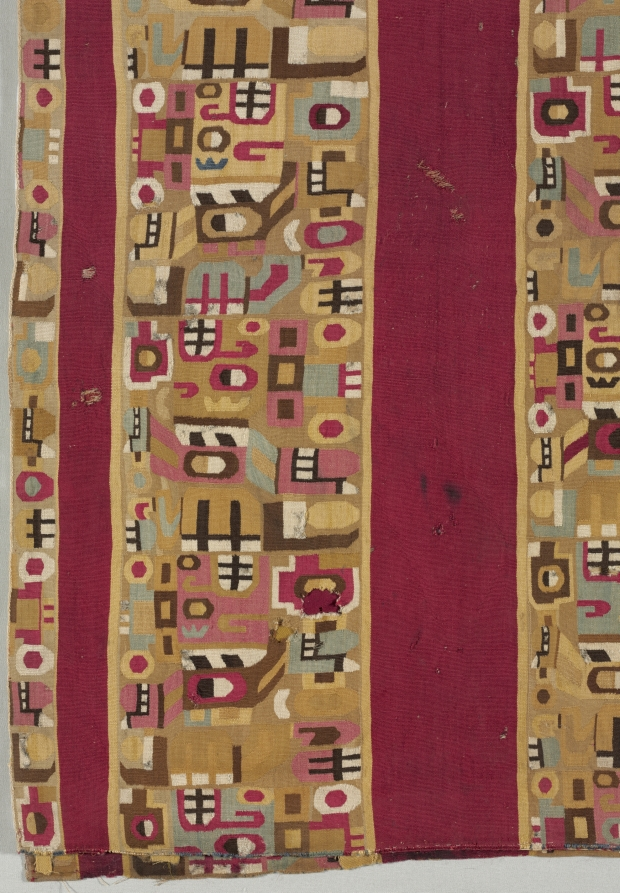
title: Tunic with Sacrificer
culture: South America, Peru, Central Andes, Middle Horizon, Wari people, 7th-11th century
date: 600–1000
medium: camelid-fiber, cotton; tapestry weave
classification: Textile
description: An extremely abstract supernatural sacrifice repeats in different colors and orientations across the body of this tunic, which was shortened on one side in antiquity. Look for the toothy black-and-white mouth in the sacrificer's upward-gazing head; other facial features include a button nose and a vertically divided eye. The figure holds the L-shaped haft of an axe behind its back and, at the front of its body, a short staff with a severed, upside-down human head on the top.